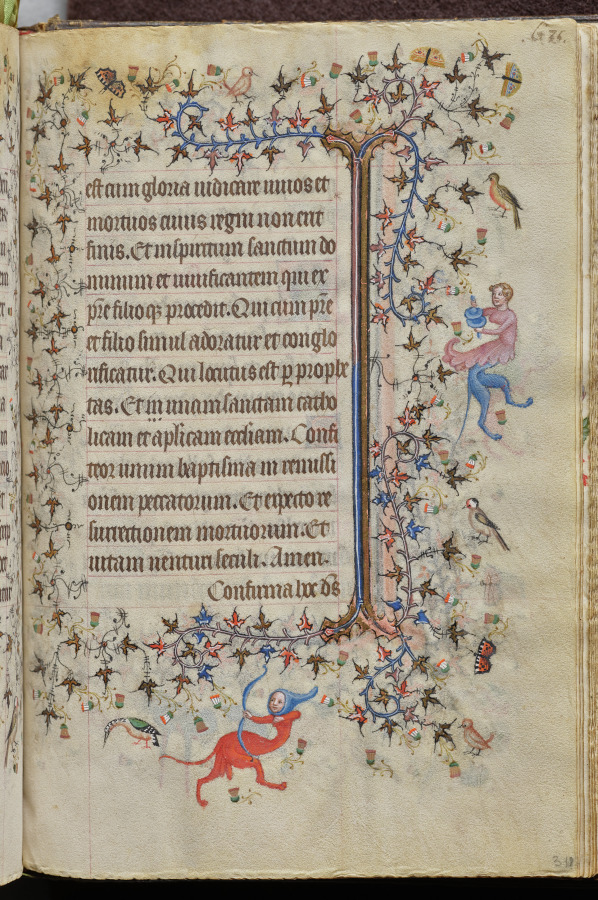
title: Hours of Charles the Noble, King of Navarre (1361-1425), fol. 312r, Text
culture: France, Paris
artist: Master of the Brussels Initials and Associates (French)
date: c. 1405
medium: ink, tempera, and gold on vellum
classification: Bound Volume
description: This precious volume was obviously highly prized by its owner, the French-born King of Navarre, who had his coat of arms painted on no less than twenty folios. Rather than directly commissioning this manuscript from a specific workshop, it seems that Charles the Noble acquired his book of hours -- perhaps ready-made for the luxury market -- while on a trip to Paris in 1404-05. A collaborative effort, six painting styles are evidenced within the pages of this codex, those of two Italians, two Frenchmen, and two Netherlanders. The painter who was responsible for the planning and decoration of the book, and who produced seventeen of the large miniatures, was a Bolognese artist known as the Master of the Brussels Initials. His principal assistant, responsible for most of the borders, was a Florentine who signed his name "Zecho" da Firenze on folio 208 verso.